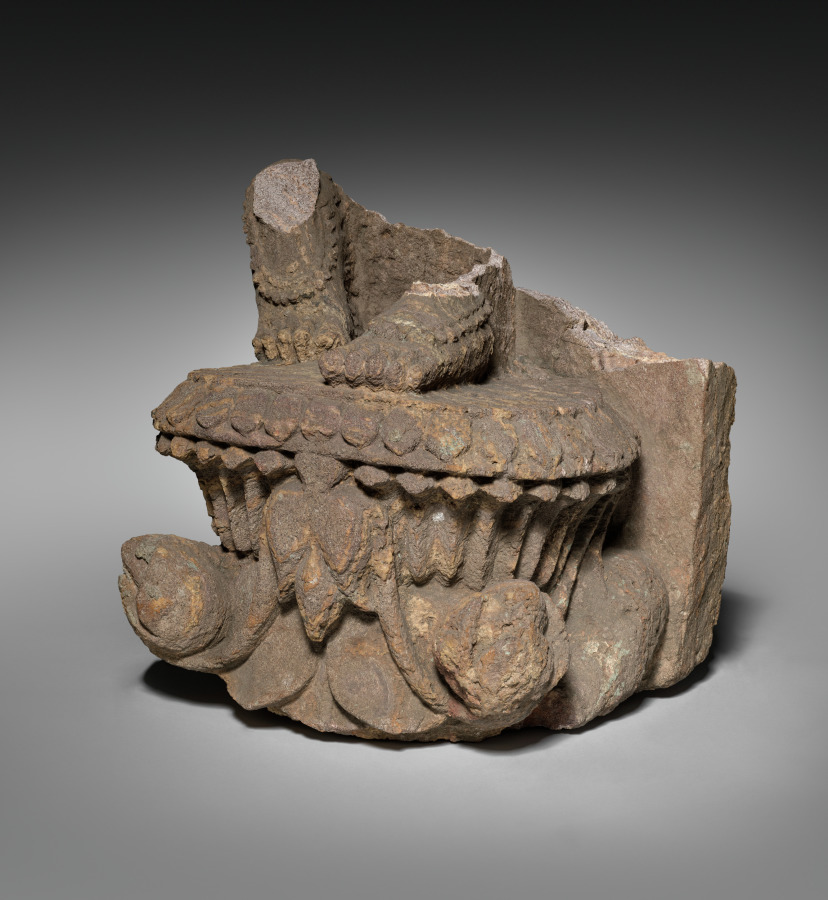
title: Base and Feet of Devata or Yakshi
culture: India, Province of Orissa, 20th century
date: 20th century fake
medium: sandstone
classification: Sculpture